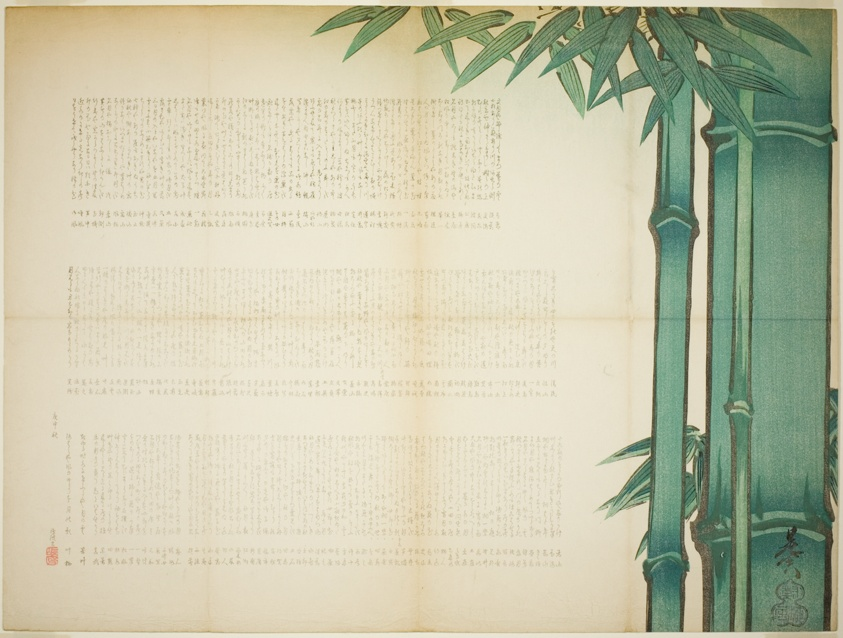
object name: Print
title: Bamboo Poetry Sheet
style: Japanese (culture or style)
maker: Shibata Zeshin (Japanese, 1807-1891)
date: fall 1860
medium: Color woodblock print; surimono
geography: Japan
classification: woodblock print; print; asian art